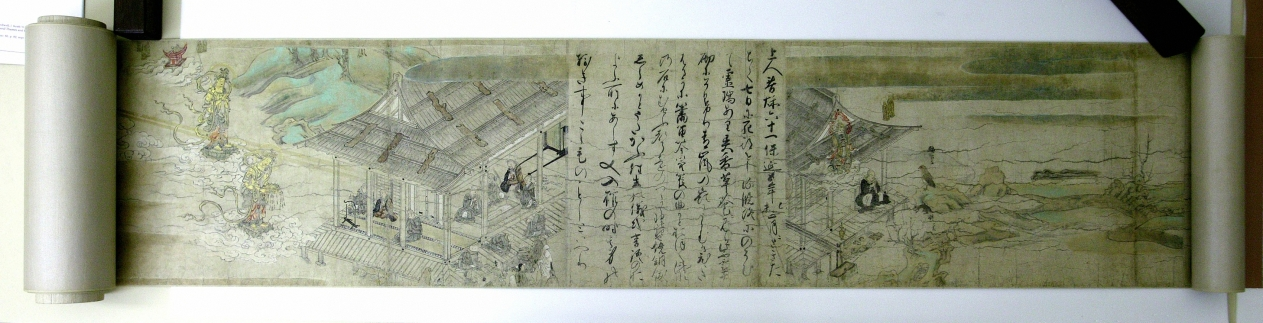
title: The Illustrated Miraculous Origins of the Yūzū Nenbutsu School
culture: Japan, Kamakura period (1185–1333)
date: early 1300s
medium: Handscroll; ink, color, and gold on paper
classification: Painting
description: This painting is the second of a set of two illustrated handscrolls. The first scroll depicts the biography of the Japanese Buddhist monk Ryōnin. This scroll begins with scenes of Ryōnin’s death and relates episodes illustrating the efficacy of following his teachings. Ryōnin asserted the total interconnectedness of all things and the spiritual benefit of chanting the name of the Buddha Amida for one another.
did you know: The other scroll from this two-scroll set belongs to the Art Institute of Chicago.